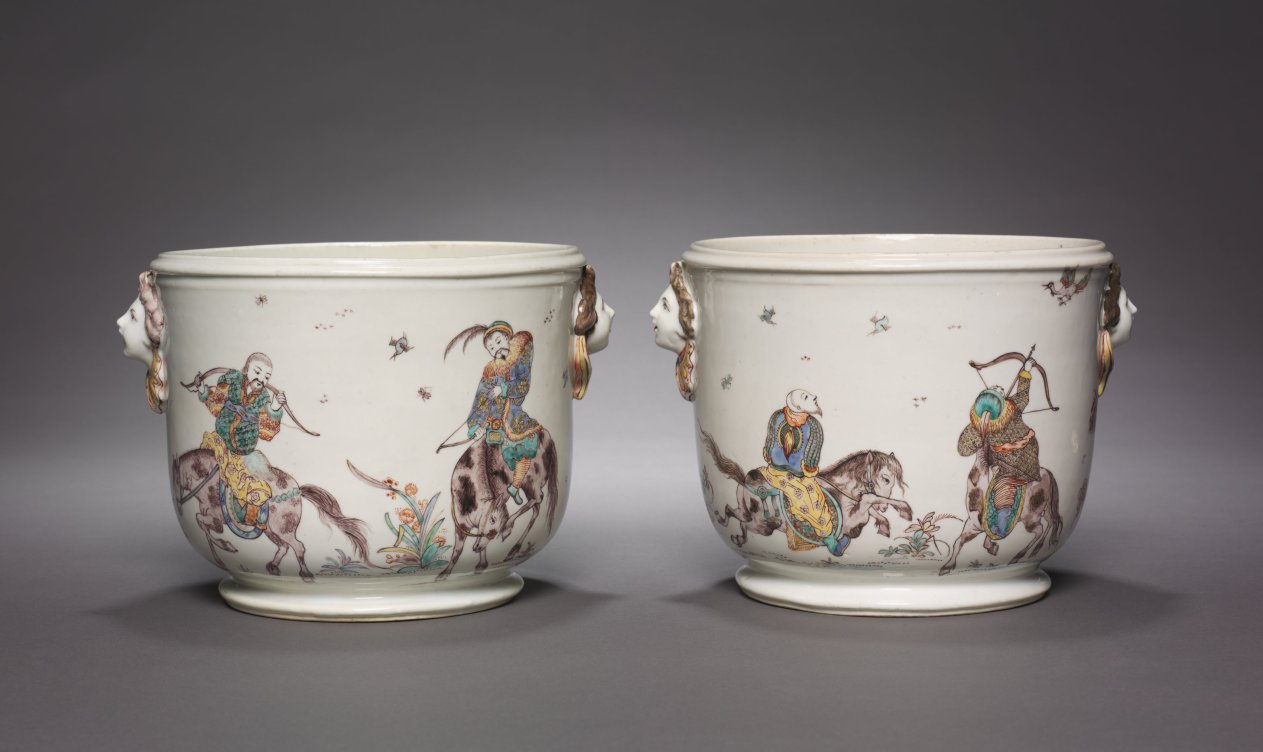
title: Pair of Bottle Coolers (seaux à rafraîchir)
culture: France, Villeroy, 18th century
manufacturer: Villeroy Factory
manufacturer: Mennecy- Villeroy Factory (French)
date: c. 1740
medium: Tin-glazed soft-paste porcelain with enamel decoration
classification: Ceramic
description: These bottle coolers combine a traditionally European form based on silver models with designs and compositions that emulate Chinese and Japanese porcelain. Towering over the figures the luxuriant, vividly colored vegetation is characteristic of chinoiserie, imitations of East Asian decoration and design common in 18th-century European decorative arts. Distorted by the European imagination, these imitations were not accurate representations of the cultures from which they drew inspiration.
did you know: The four figures on horseback are derived from prints French designer Jean Antoine Fraisse modeled after textiles, lacquers, and porcelains found in the collection of Louis-Henri, duke of Bourbon.